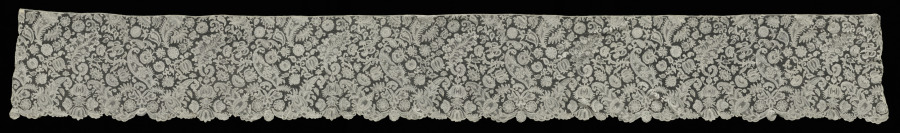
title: Lace Edging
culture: Belgium, Brussels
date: 1700s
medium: Linen: bobbin lace (Point d'Angleterre)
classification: Lace